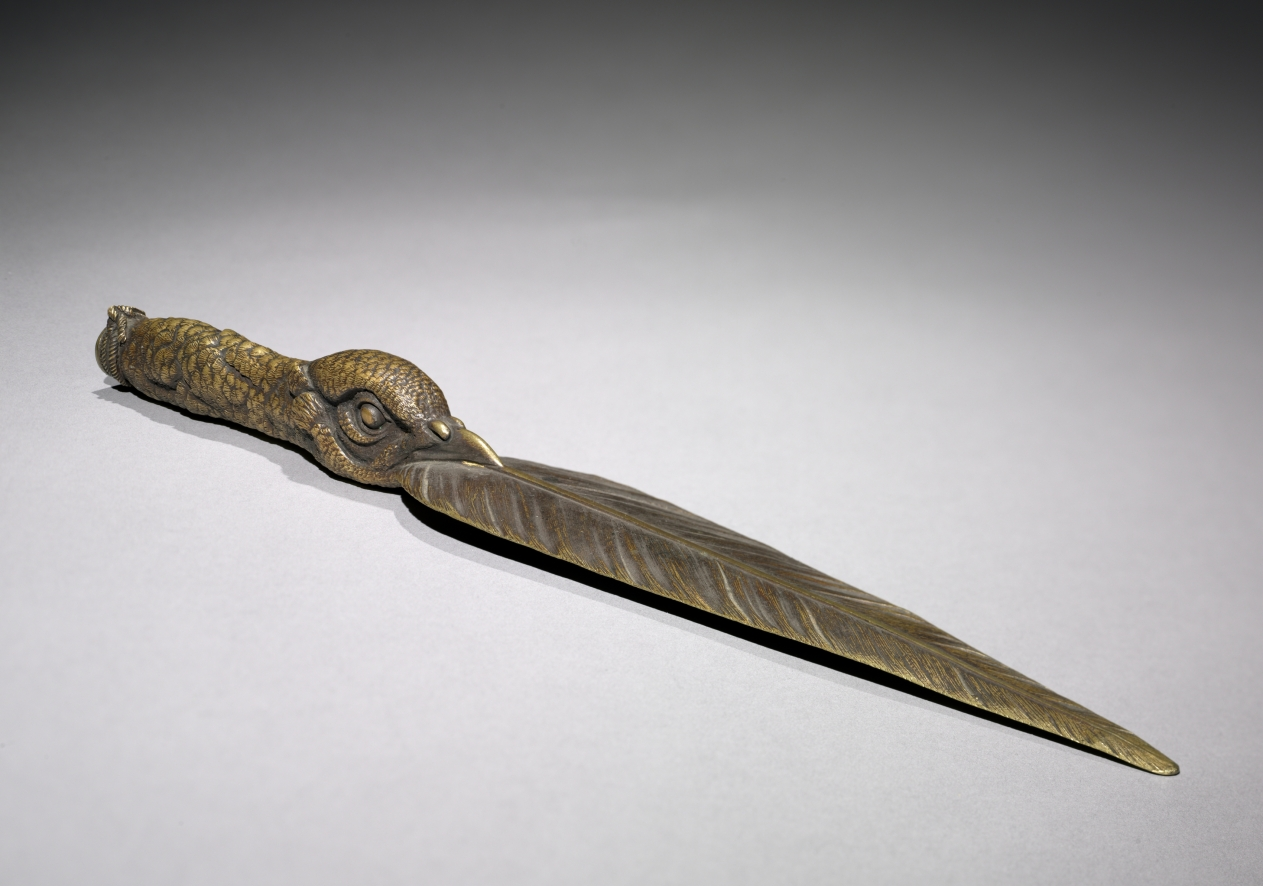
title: Paper Knife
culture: France, 19th century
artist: Jules Pierre Moigniez (French, 1835–1894)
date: 1800s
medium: bronze, golden brown patina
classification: Metalwork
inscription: inscribed on lower bill of bird, in ligature: "J MOIGN[IEZ?]."